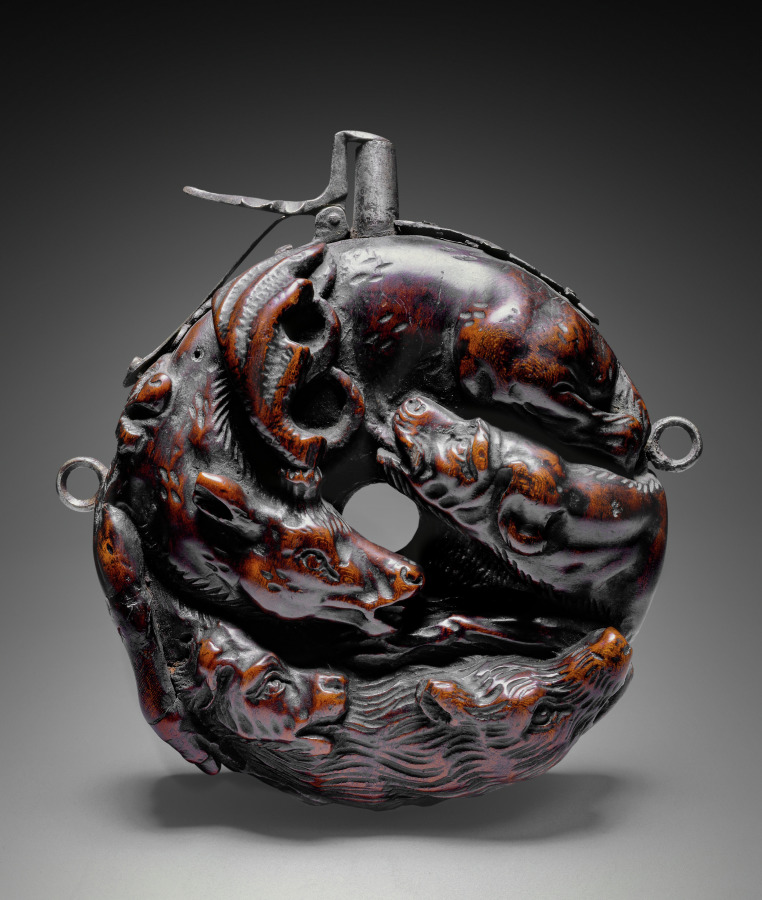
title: Powder Flask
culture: German, Swabian, Gmünd, 17th century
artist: Johann Michael Maucher (German, 1645–1701)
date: c. 1680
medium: boxwood with design of stag and hounds carved in high relief; steel funnel, mounts, springcatch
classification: Arms and Armor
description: Powder flasks are small, portable containers designed to hold gunpowder. From the 1400s to the 1800s, powder flasks were indispensable for charging and priming firearms of all types. Without powder flasks firearms were of little use to their owners. Many highly decorated flasks rank as works of art.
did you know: Johann Michael Maucher was the most famous member of a Schwabian family of ivory, wood, and amber carvers.